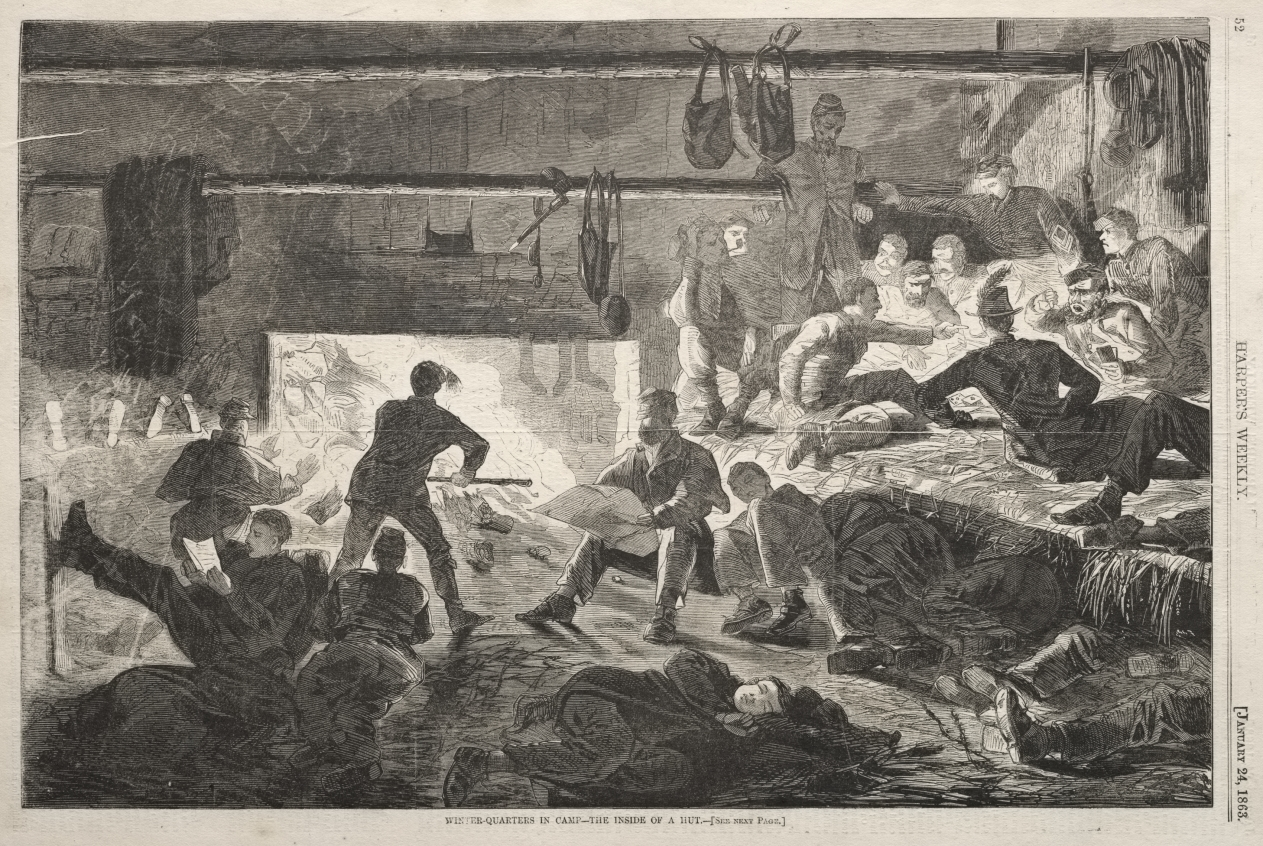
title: Winter Quarters in Camp - The Inside of a Hut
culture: America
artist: Winslow Homer (American, 1836–1910)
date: 1863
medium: wood engraving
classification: Print